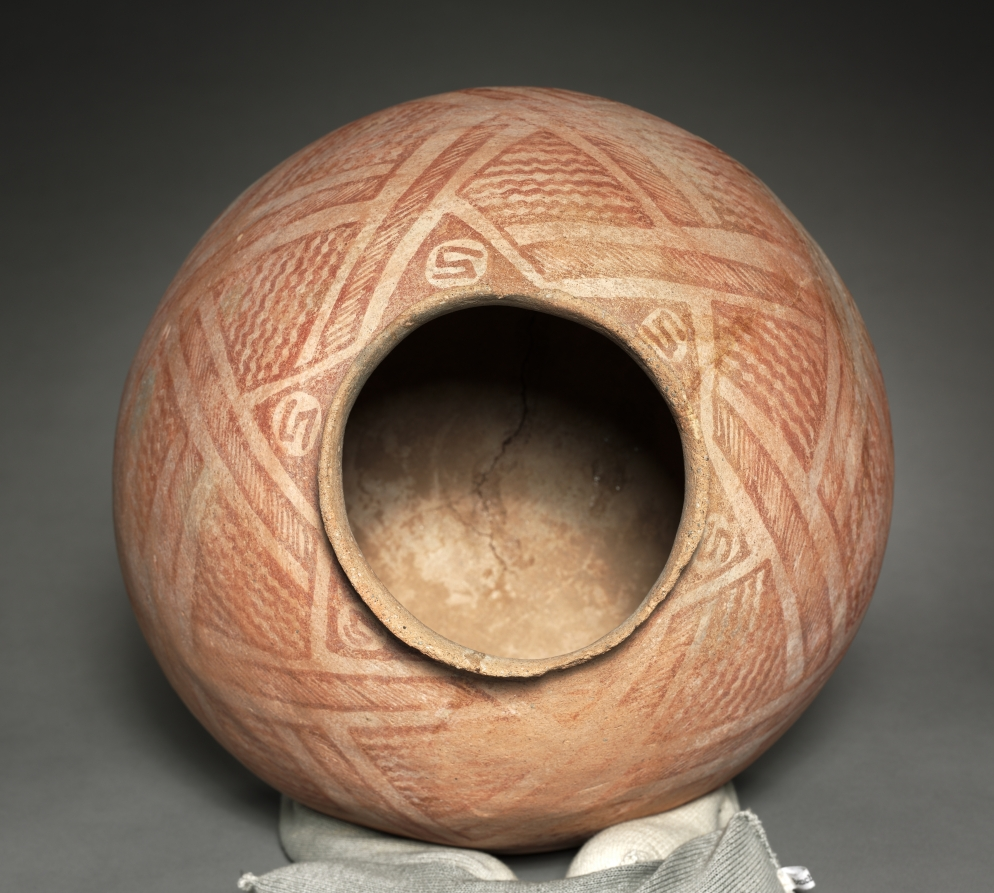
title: Large Storage Jar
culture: Southwest, Arizona, Hohokam, 10th-11th century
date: c. 900–1100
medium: Ceramic, slip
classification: Ceramic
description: The Hohokam Arizona were accomplished agriculturalists whose decline after 1350 was caused partially by drought, and then flooding that overcame irrigation canals. Many Hohokam settlements boasted large public structures including platform mounds and oval ballcourts. The latter reveal contact with Mexico, where the ballgame was a long-established tradition.